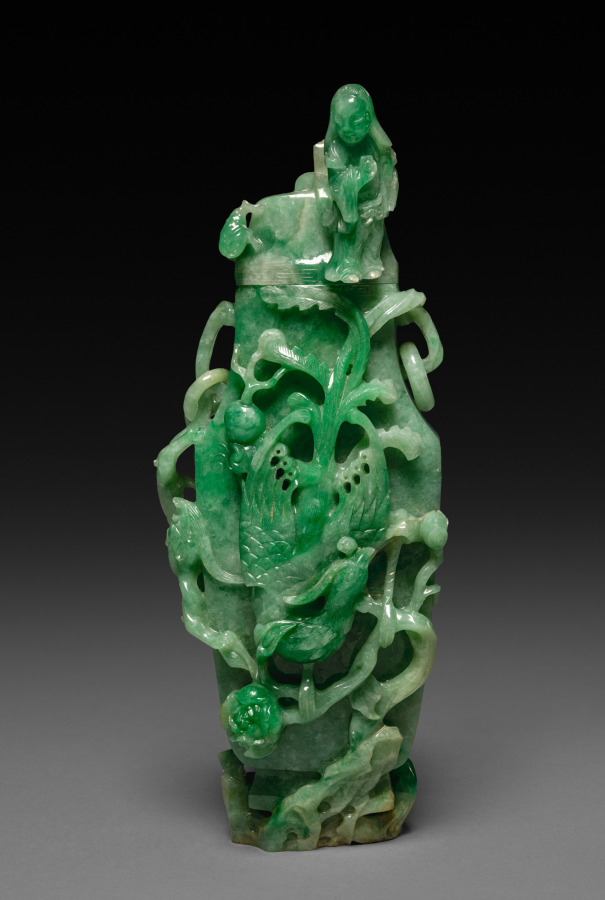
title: Three-Sectional Altar Group: Cylindrical Carving with Phoenix (lid)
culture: China, Qing dynasty (1644-1911)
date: 1644–1911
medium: jade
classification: Jade